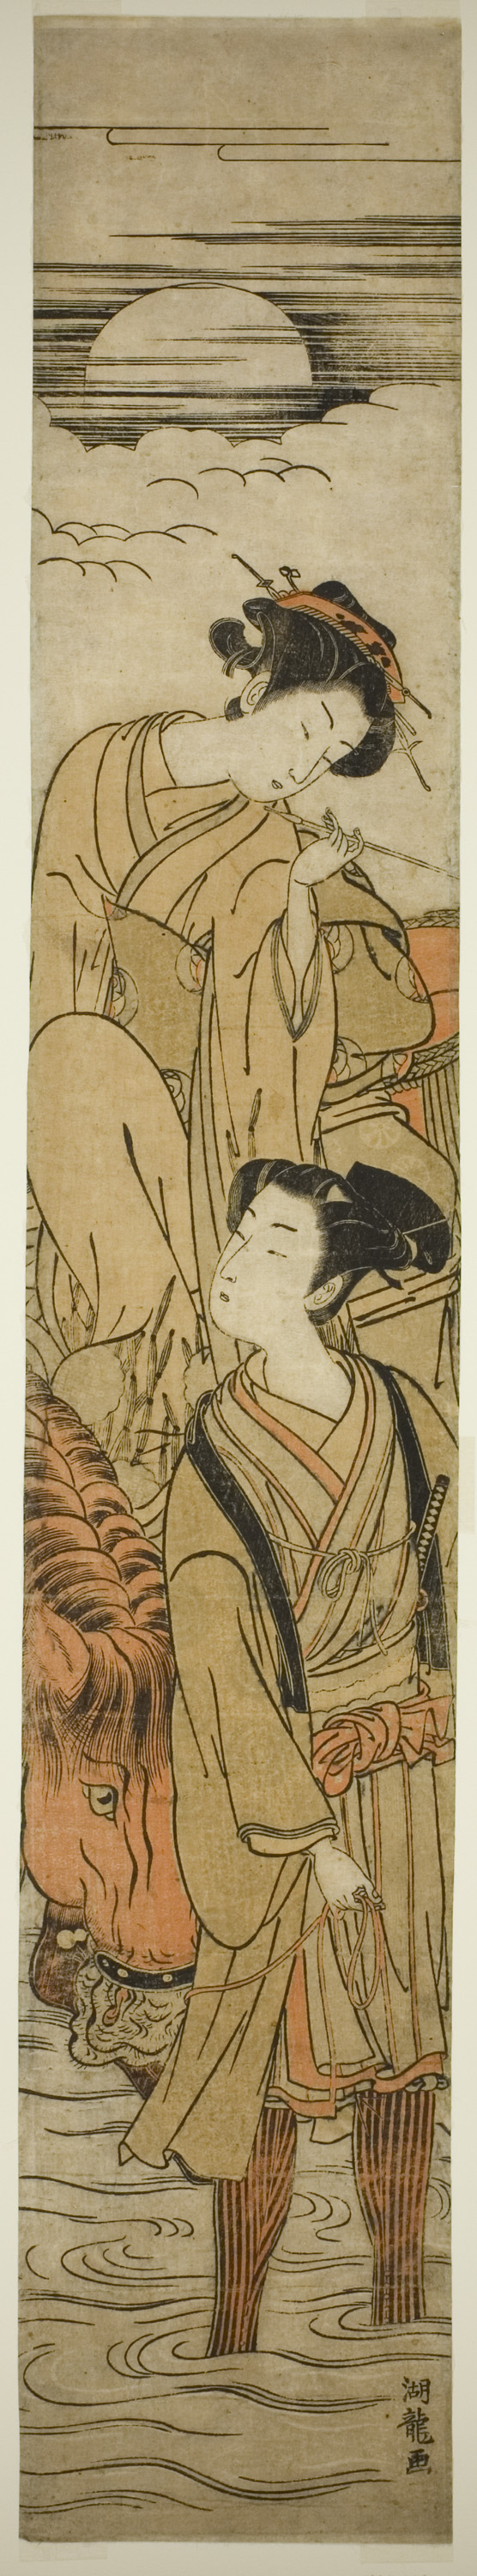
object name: Print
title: Crossing a River on a Moonlit Night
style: Japanese (culture or style)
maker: Isoda Koryusai (Japanese, 1735-1790)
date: c. 1775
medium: Color woodblock print; hashira-e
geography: Japan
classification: woodblock print; print; asian art